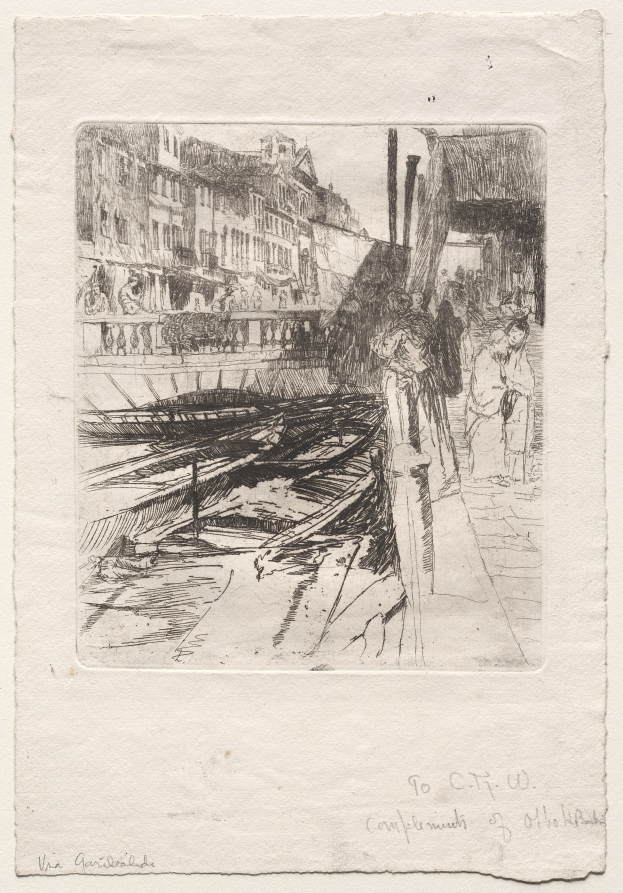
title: Via Garibaldi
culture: America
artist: Otto H. Bacher (American, 1856–1909)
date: late 19th-early 20th century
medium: etching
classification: Print